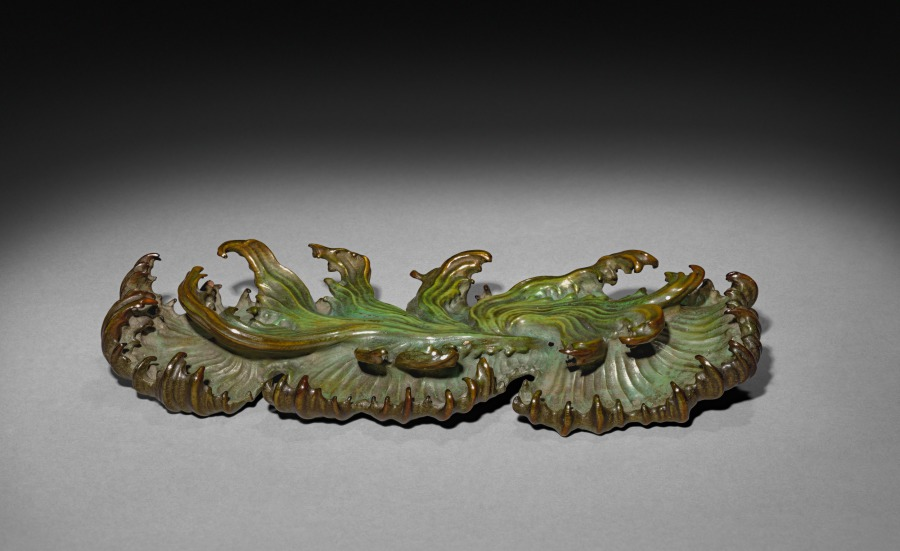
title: Figure of Daoist Immortal He Xiangu (base)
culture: China, Qing dynasty (1644-1911)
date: 1700s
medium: Colored ivory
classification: Wood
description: He Xiangu is one of the Eight Immortals in the Daoist pantheon. She was thought have been a real person who lived in the Tang dynasty, originally named He Qiong. As a teenager, she was instructed in a dream to eat powdered mica to become immune from death and to vow to remain unmarried. She did so and became an enlightened practitioner of Daoism. In this delicate carving, He Xiangu is placidly seated in a gnarled and knotty wooden raft amid green-tinted ivory waves. In front of her rests a bamboo basket filled with objects associated with Daoist immortality, while she holds a branch of lingzhi fungus.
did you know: He Xiangu's boat rests on a wave-shaped base carved from ivory that has been dyed green.